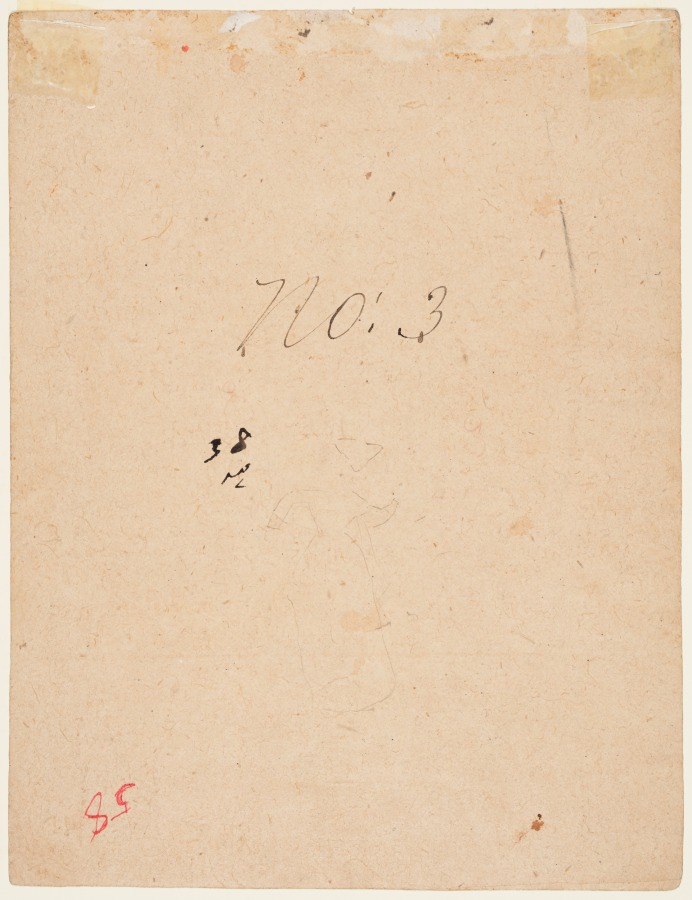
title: Taking of the toll, Dana-Lila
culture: Northern India, Pahari kingdoms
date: c. 1760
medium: Gum tempera and gold on paper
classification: Painting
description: Radha, the blue god Krishna’s beloved, raises one hand, reddened with henna (temporary natural dye), to strike him. Cows and her companions look on. This interlude is based on a devotional poem written by Dev Datt (about 1673–1745), in which he imagines this scene. Radha has dressed up as a soldier of the evil tyrant Kamsa. She shouts, “You are accused of taking the toll from milkmaids. . . . You are a traitor!” In the distance at the top of the painting, Krishna’s friends, who do not know that the couple is playing, run away in fear.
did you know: One milkmaid points to her mouth in a gesture of surprise.